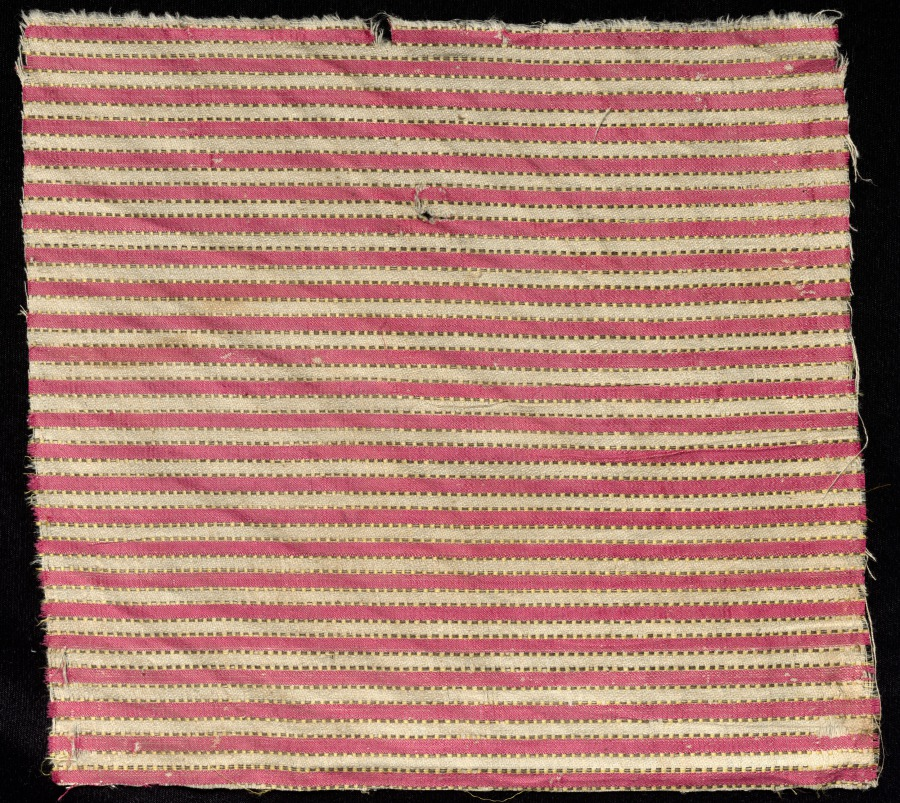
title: Fragment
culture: India, Surat, 19th century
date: 1800s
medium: brocade, "himru"; cotton and silk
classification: Textile